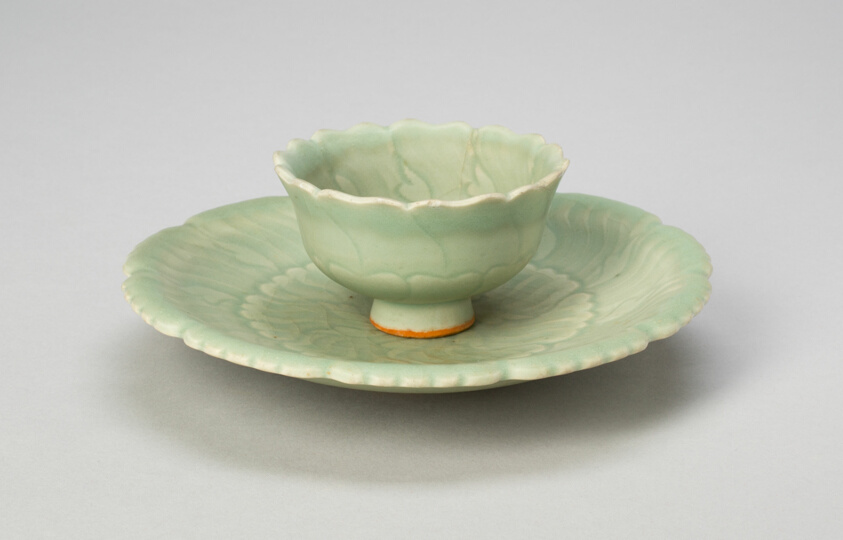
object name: Decorative Arts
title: Foliate Cup and Stand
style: Chinese (culture or style)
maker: China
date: Yuan dynasty (1279–1368), 14th century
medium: Longquan ware; stoneware with underglaze molded decoration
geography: China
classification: drinking vessel; stoneware; asian art; ceramics; decorative arts